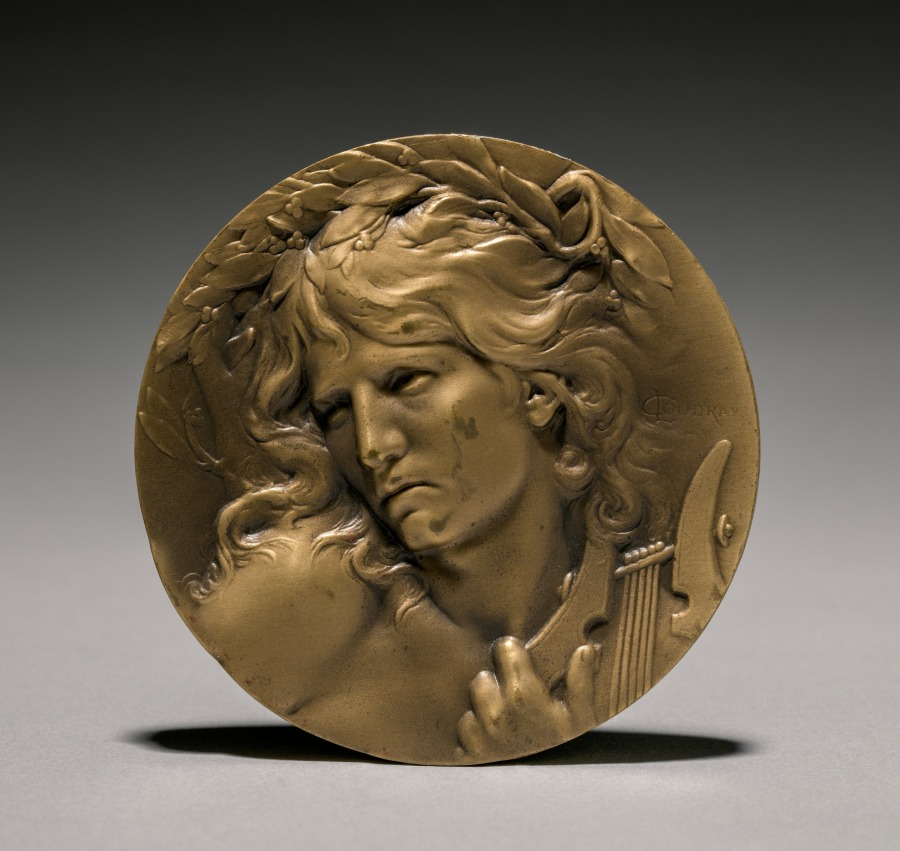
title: Medal (obverse)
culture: France, 20th century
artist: Marie Alexandre Lucien Coudray (French, 1864–1932)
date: 1900s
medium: bronze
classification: Metalwork